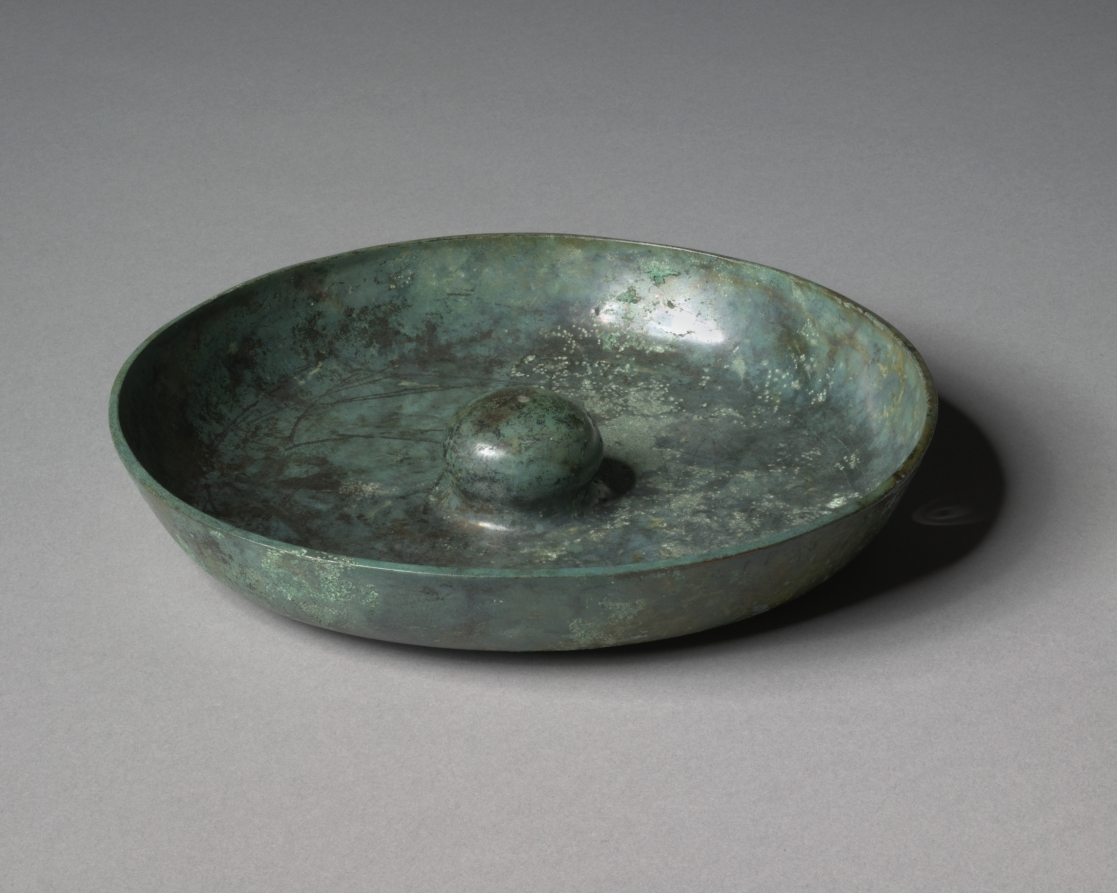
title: Phiale (Libation Dish)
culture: Greece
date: c. 500–400 BCE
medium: bronze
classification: Metalwork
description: This phiale or libation dish takes the form of a shallow bowl with a round protrusion in the center. Dishes of this type were used for many different rituals: when asking for blessings or good fortune, giving thanks, praying for fertility, and when celebrating athletic victories or weddings. Pouring libations for the gods was one of the oldest forms of worship in the ancient world.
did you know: The central projection within the phiale is called an omphalos (“navel”).